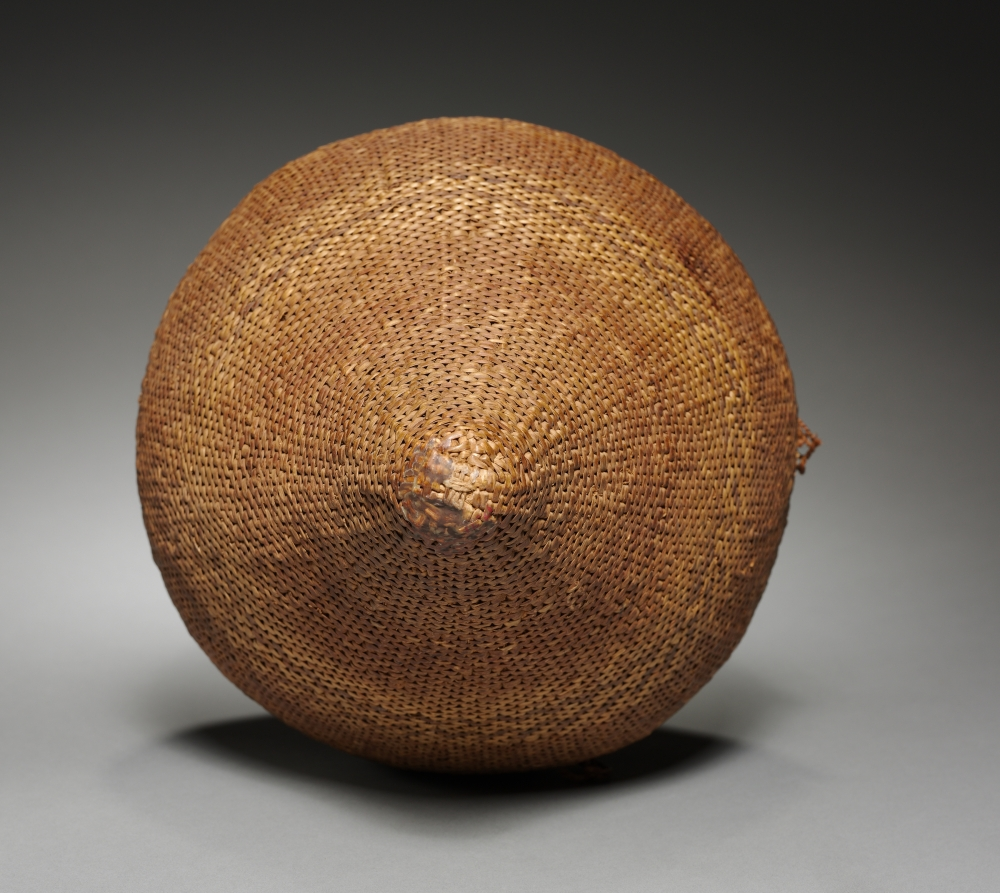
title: Seed Storage Jar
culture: Great Basin, Paiute, Kern County, Unassigned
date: Unassigned, before 1917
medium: peeled and unpeeled willow, diagonal twine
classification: Basketry